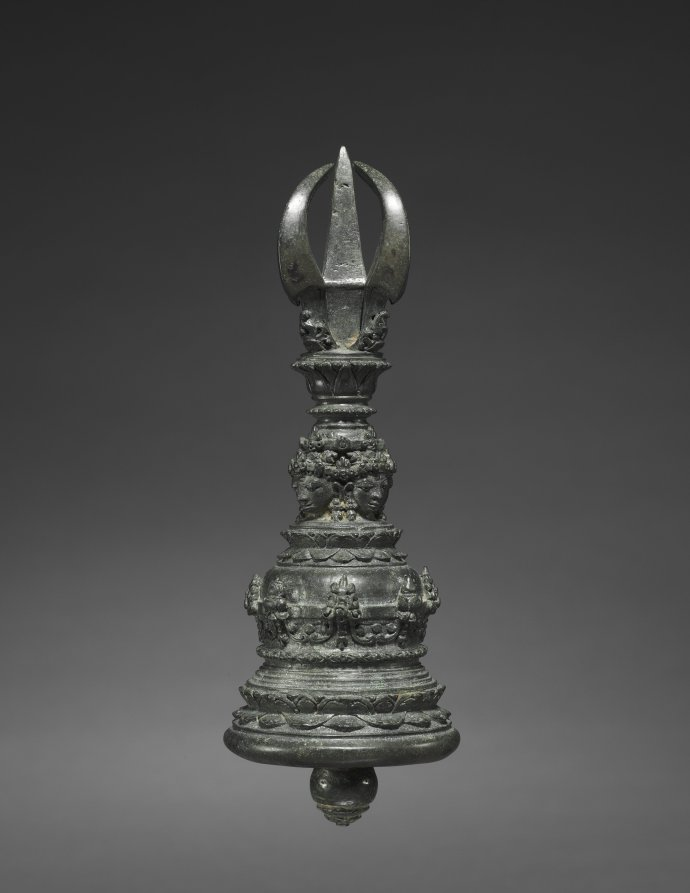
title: Bell with Vajra Handle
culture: Indonesia, Java, 10th century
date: 900s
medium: bronze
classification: Sculpture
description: The vajra and bell as a pair are an important combination of tantric implements. When used together, the vajra is held in the right hand and stands for tantric method; the bell refers to wisdom and is held in the left hand. When a tantric master holds the vajra and bell, he takes on the guise of an enlightened being who teaches and models tantric methods with wisdom and understanding.